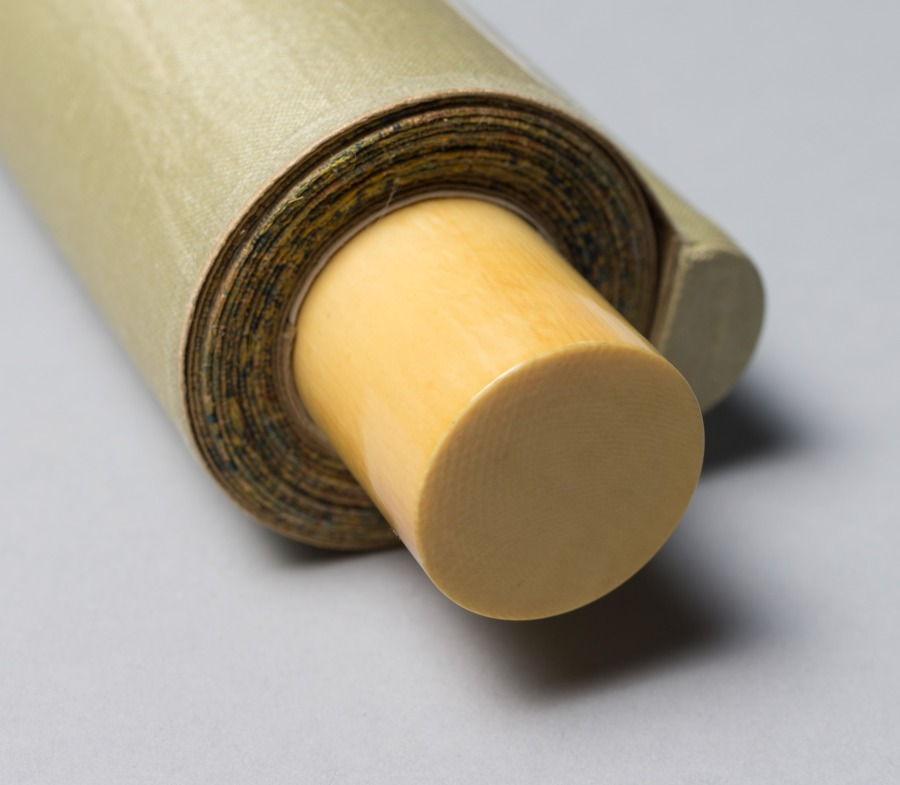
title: Buddha Amitābha with Two Attending Bodhisattvas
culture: China, Southern Song dynasty (1127-1279)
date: 1200s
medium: Hanging scroll; ink and color on silk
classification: Painting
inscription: 南無阿彌陀佛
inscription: 沙門善導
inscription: 觀世音菩薩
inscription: 大勢至菩薩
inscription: 永隆元年十月十五日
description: The supreme deities that rule over the Western Paradise—Amitābha (阿彌陀 in Chinese), Avalokiteśvara (Guanyin 觀音), and Mahāsthāmaprāpta (Dashizhi 大勢至)—are here enclosed within a circle of light. To secure entry into that paradise for Buddhist followers of the Pure Land sect, one must recite the phrase namo amituofo (南無阿彌陀佛, Homage to the Buddha Amitābha). Here the phrase is repeated 10 times in calligraphy above the figures, reinforcing the need for continual recitation.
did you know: Each line of calligraphy, which invokes the Buddha's name, emerges from a lotus blossom.